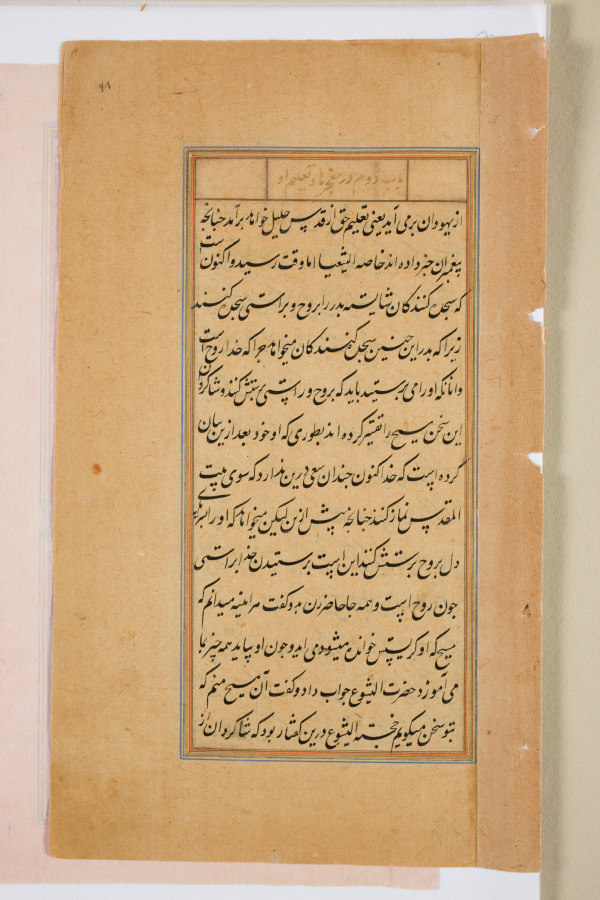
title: Text page from a Mirror of Holiness (Mir’at al-quds) of Father Jerome Xavier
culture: Mughal India, Allahabad, made for Prince Salim (1569–1627)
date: 1602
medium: Ink and gold on paper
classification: Manuscript